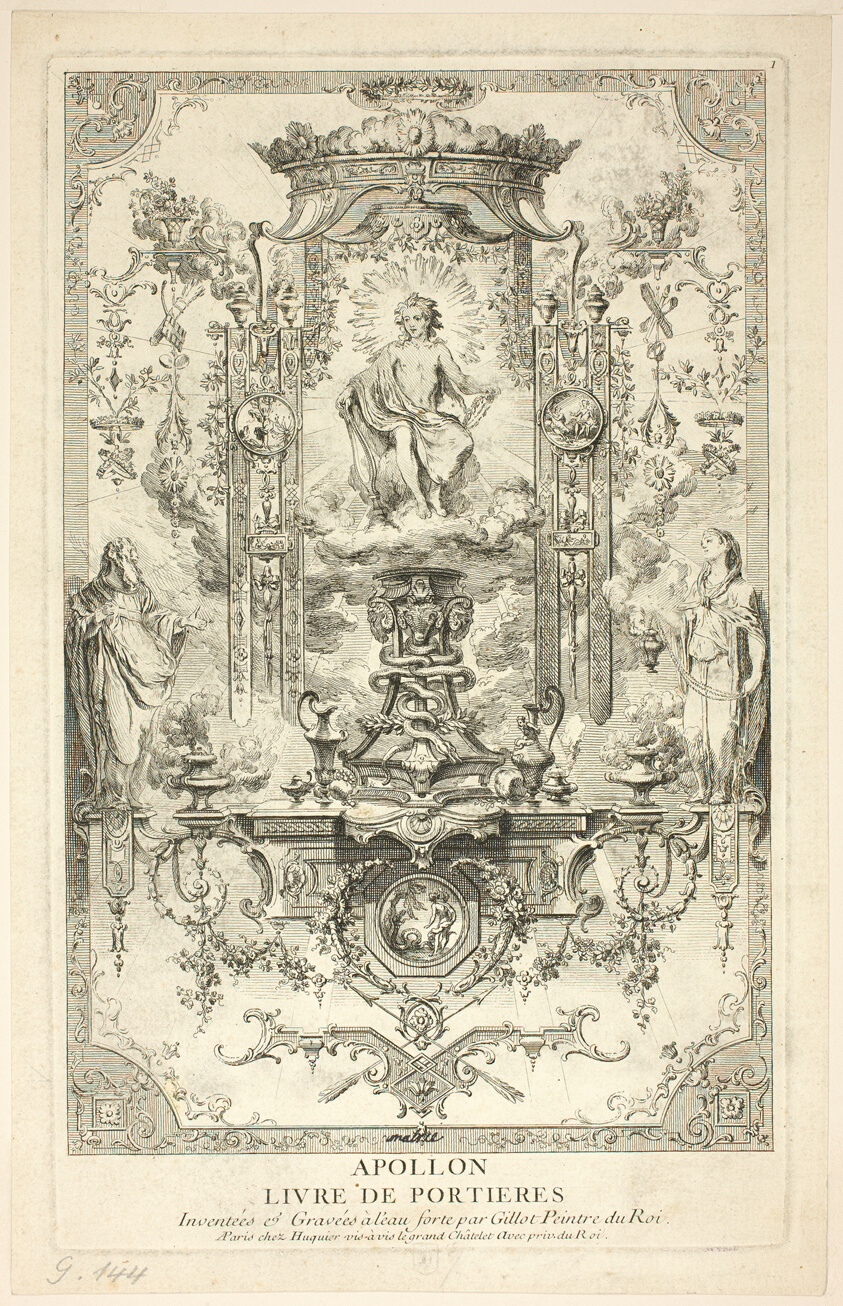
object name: Print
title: Apollo, from Livre de Portieres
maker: Claude Gillot (French, 1673-1722)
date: published 1737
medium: Etching on cream laid paper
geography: France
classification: etching; print; prints and drawing